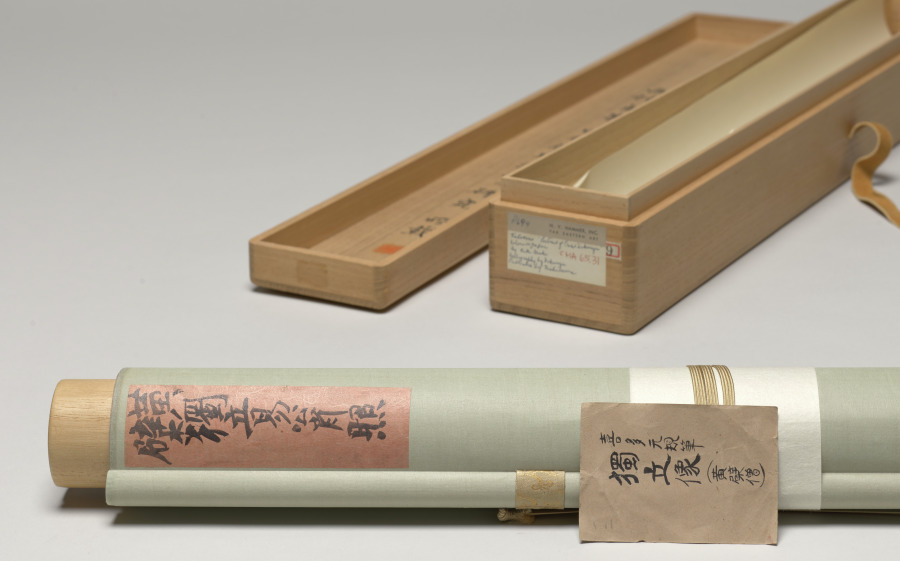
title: Portrait of Duli Xingyi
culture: Japan, Edo period (1615–1868)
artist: Kita Genki (Japanese, active c. 1664–98)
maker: Duli Xingyi (Chinese, 1596–1672)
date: 1671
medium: hanging scroll; ink and color on paper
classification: Painting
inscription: 1671 inscription at top of scroll by Duli Xingyi with three seals, 東矣䪩 (prefatory), 遺世獨立 (top) , 天外一閒人 (bottom); seal of Genki at lower left of painting 元規 .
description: In this portrait, the Ōbaku school Buddhist monk Duli Xingyi (born Tai Li, 1596–1672), whose name is pronounced Dokuryū Shōeki in Japanese, sits upon a woven mat holding a ceremonial scepter known as a ruyi, or nyoi in Japanese. Above his head is an insciption he added to the painting in 1671, the year before his death. It may be translated to read: Contemplative emptiness: the moon suspended over the village at midnight. Suddenly my soul is startled by the howl of an ape. Who could know that it would arouse me beyond my senses, and bring me an inner vision from Mt. Sumeru. (translated by Stephen Addiss and Kwan S. Wong) Originally from what is now the city of Hangzhou in China, Duli emigrated to Japan in 1653, where he took monastic vows. His skills in calligraphy and seal carving were formidable. Painter Kita Genki combined Chinese brush styles he learned in Nagasaki with Western painting techniques to capture Duli's likeness.